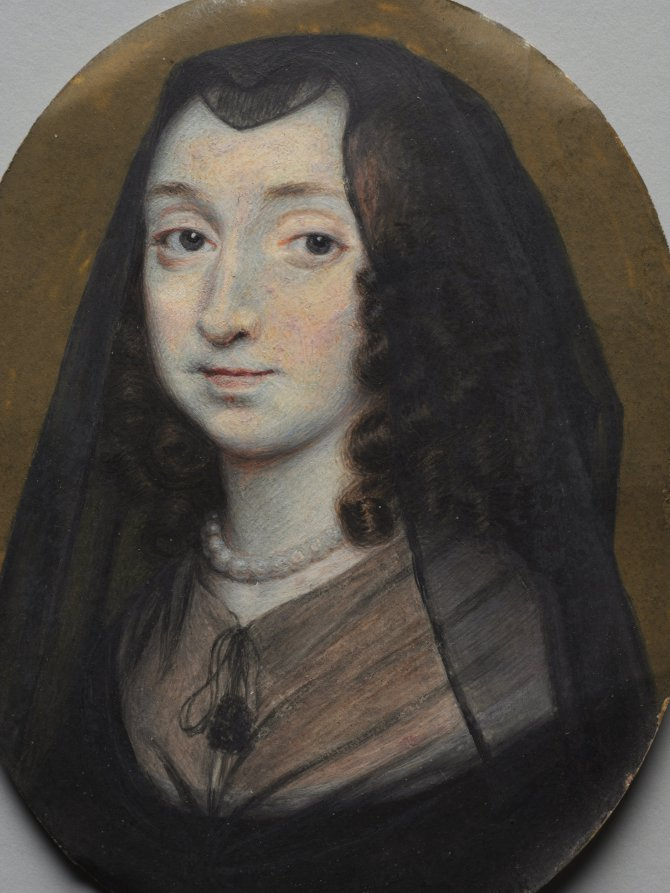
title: Portrait of Elizabeth Morrison, Lady Capell of Hadham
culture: England, 17th century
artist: Richard Gibson (British, c. 1615–1690)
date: c. 1650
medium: watercolor on vellum in a silver gilt frame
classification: Portrait Miniature